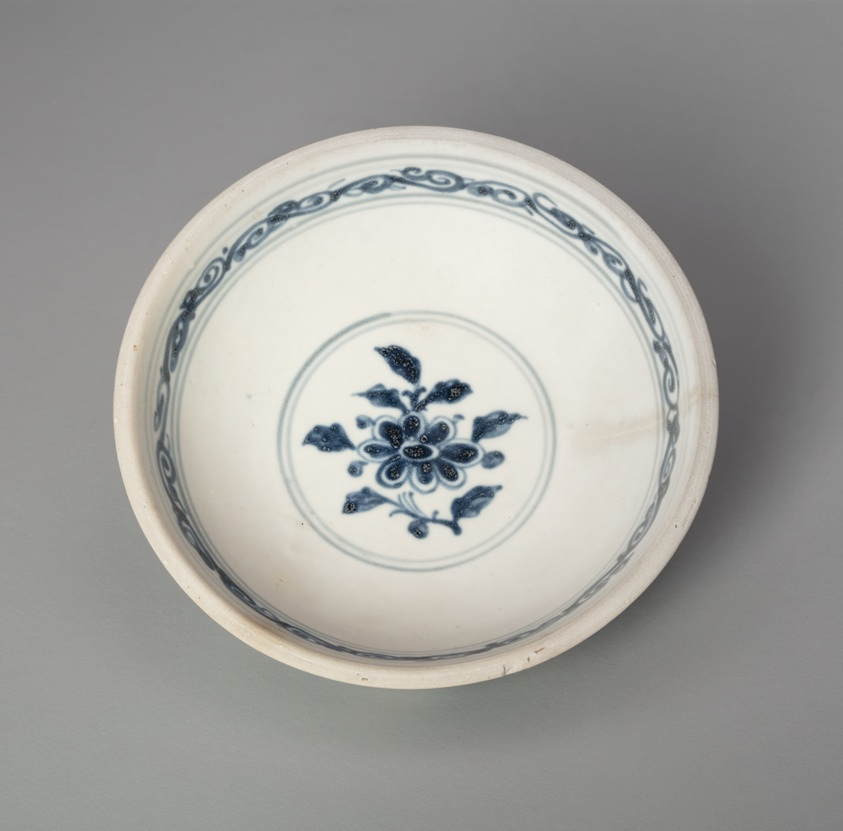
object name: Vessel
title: Small Bowl with Floral and Foliate Motif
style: annamese, vietnamese, Southeast Asian, asian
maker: Vietnam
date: Late 14th/15th century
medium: Glazed stoneware with cobalt-blue underglaze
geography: Vietnam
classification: ceramics; asian art; vessel